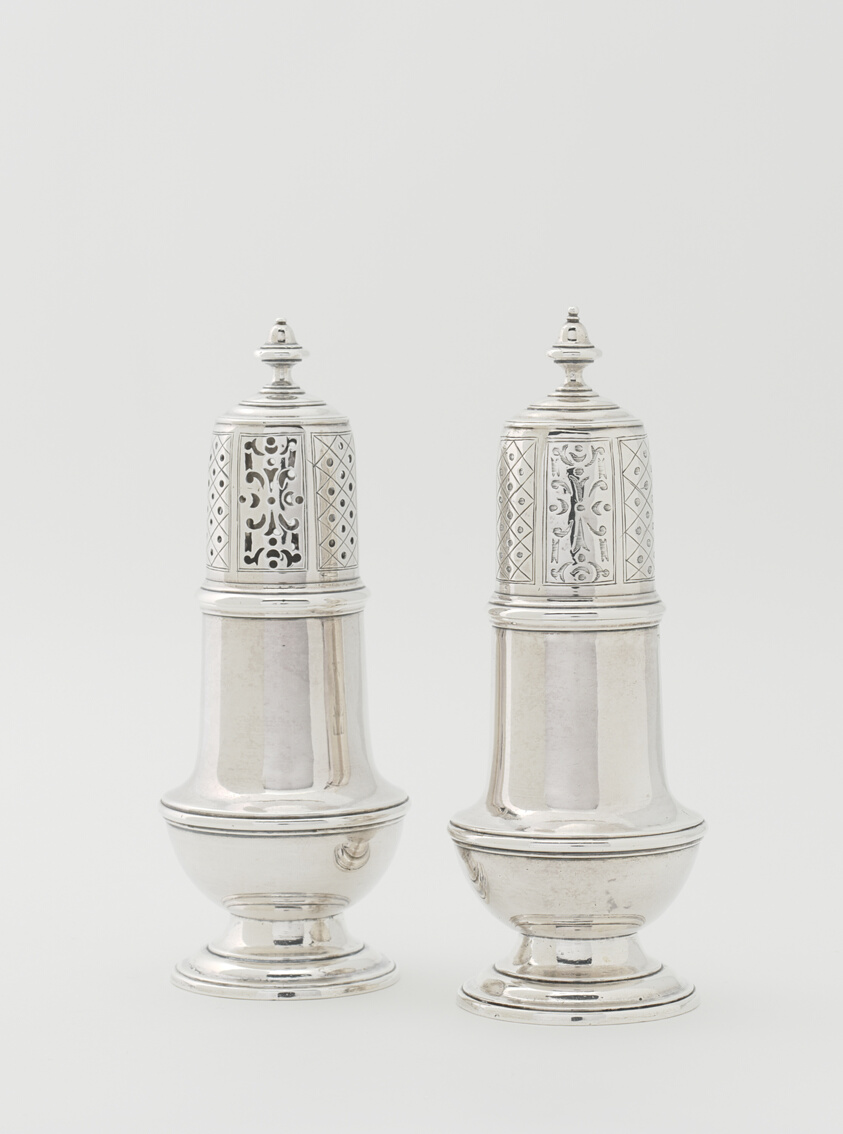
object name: Metalwork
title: Pair of Casters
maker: Attributed to Jacob Hurd; American, 1702/03–1758; Boston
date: 1740–50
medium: Silver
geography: Boston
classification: condiment vessel; silver; american decorative arts; american arts; decorative arts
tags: dining, drinking